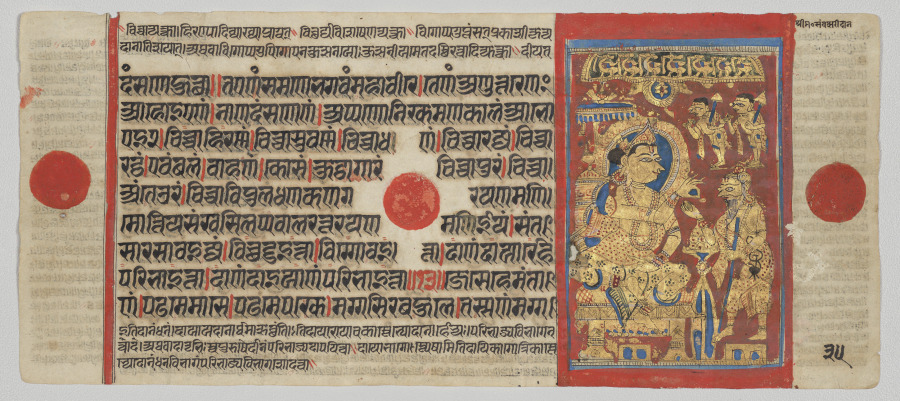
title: Mahavira Gives Away his Possessions, Folio 35 (verso), from a Kalpa-sutra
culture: Western India, Gujarat, last quarter of the 15th century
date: c. 1475–1500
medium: Gum tempera, ink, and gold on paper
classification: Painting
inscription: [[upper right]] Śrī Ma* saṃvaśsarī dān